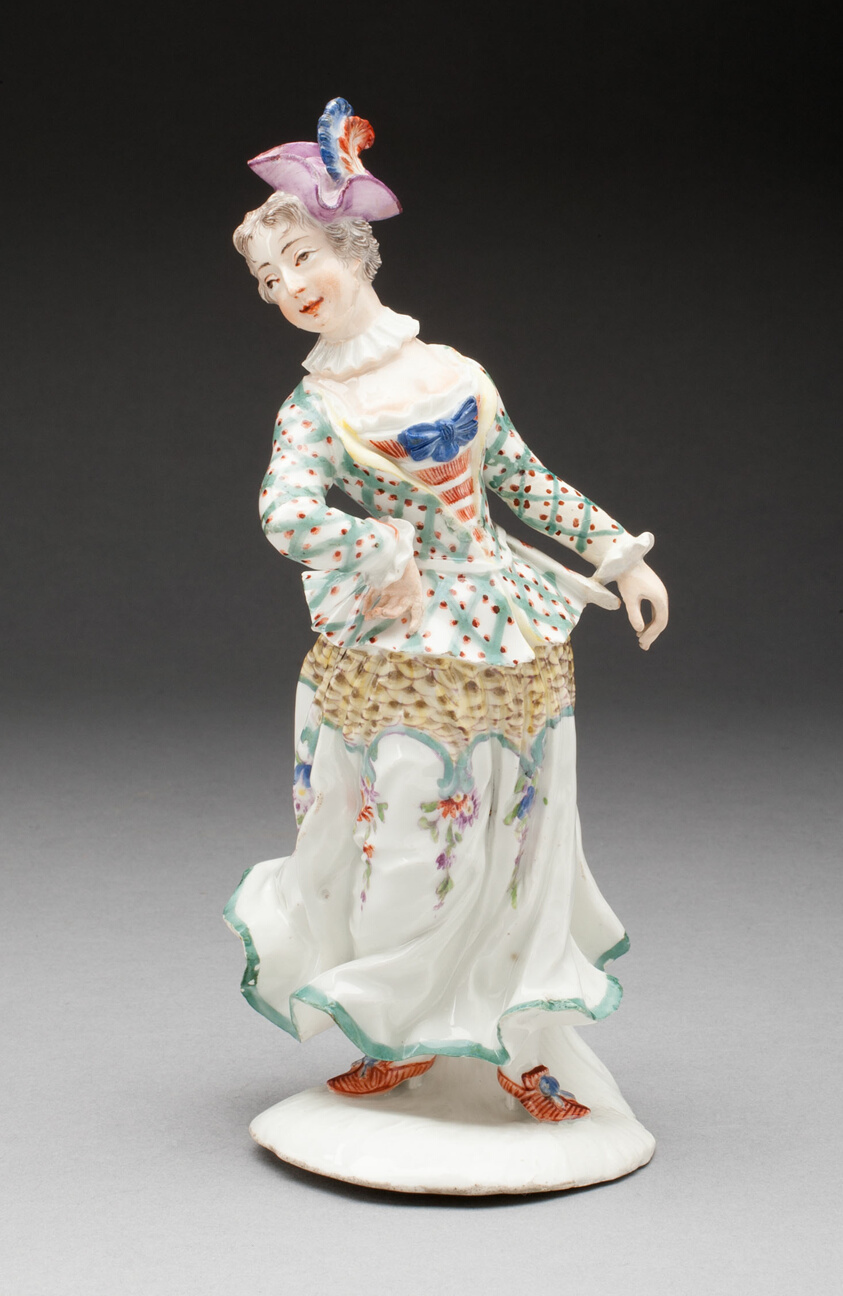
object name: Ceramics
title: Columbine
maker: Fürstenberg Porcelain Factory; German, founded 1747; after Simon Feilner, active 1733-1770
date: c. 1754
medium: Hard-paste porcelain with polychrome enamel decoration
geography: Fürstenberg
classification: sculpture; porcelain; european decorative arts; ceramics